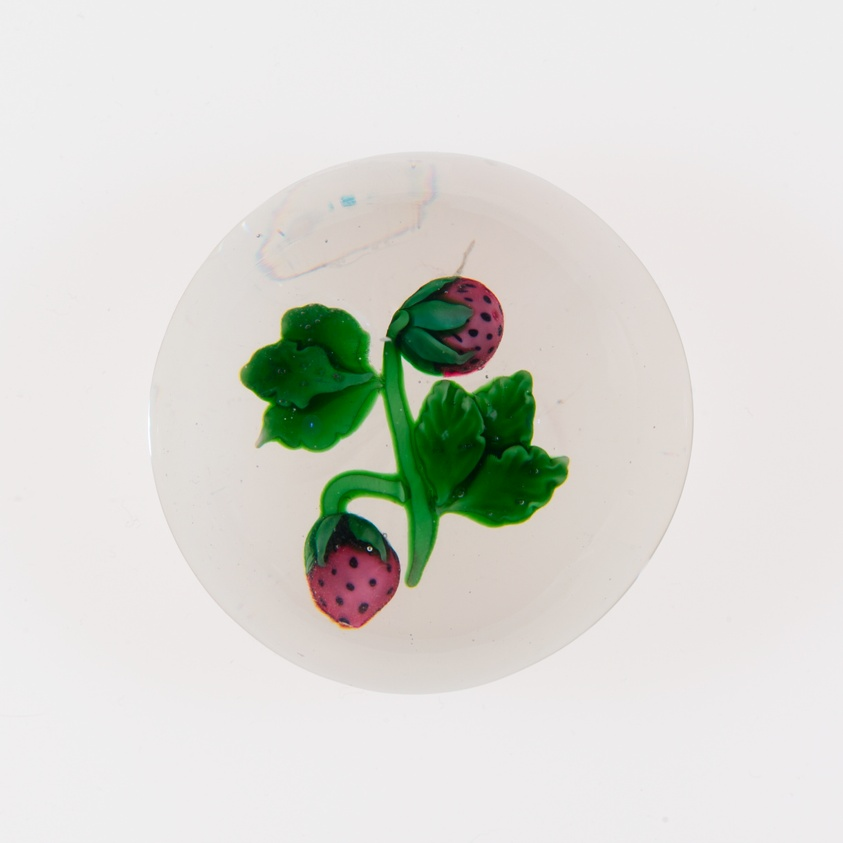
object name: Glass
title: Paperweight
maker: Baccarat Glassworks (Cristalleries de Baccarat); Lorraine, France, founded 1764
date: 19th century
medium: Glass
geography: France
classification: paperweight; glass